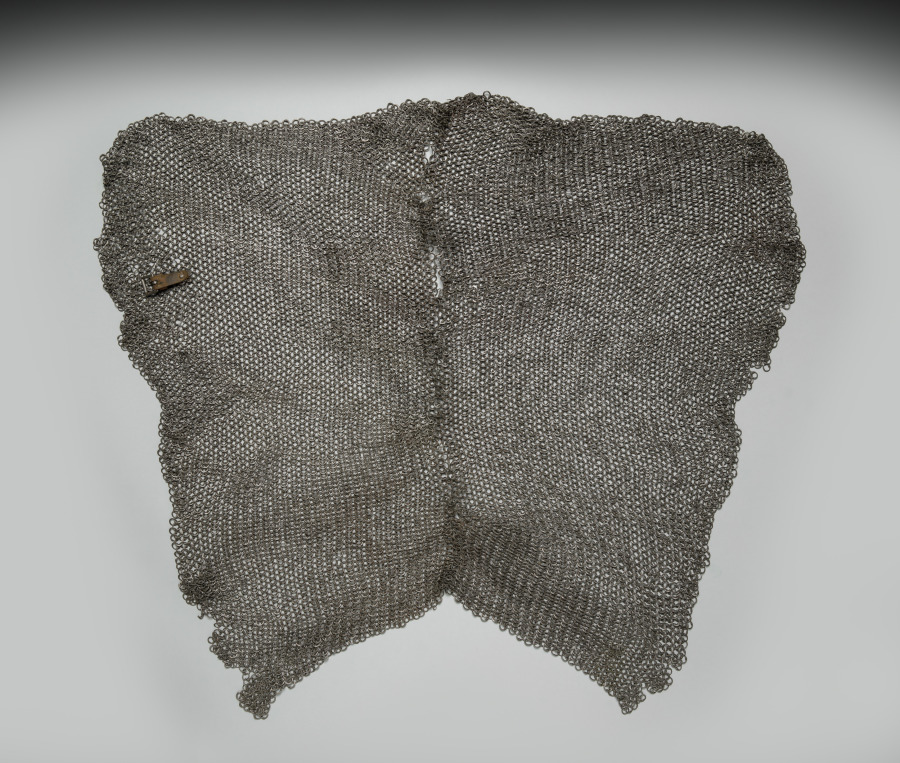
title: Hauberk of Chain Mail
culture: Europe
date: 1400s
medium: steel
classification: Arms and Armor